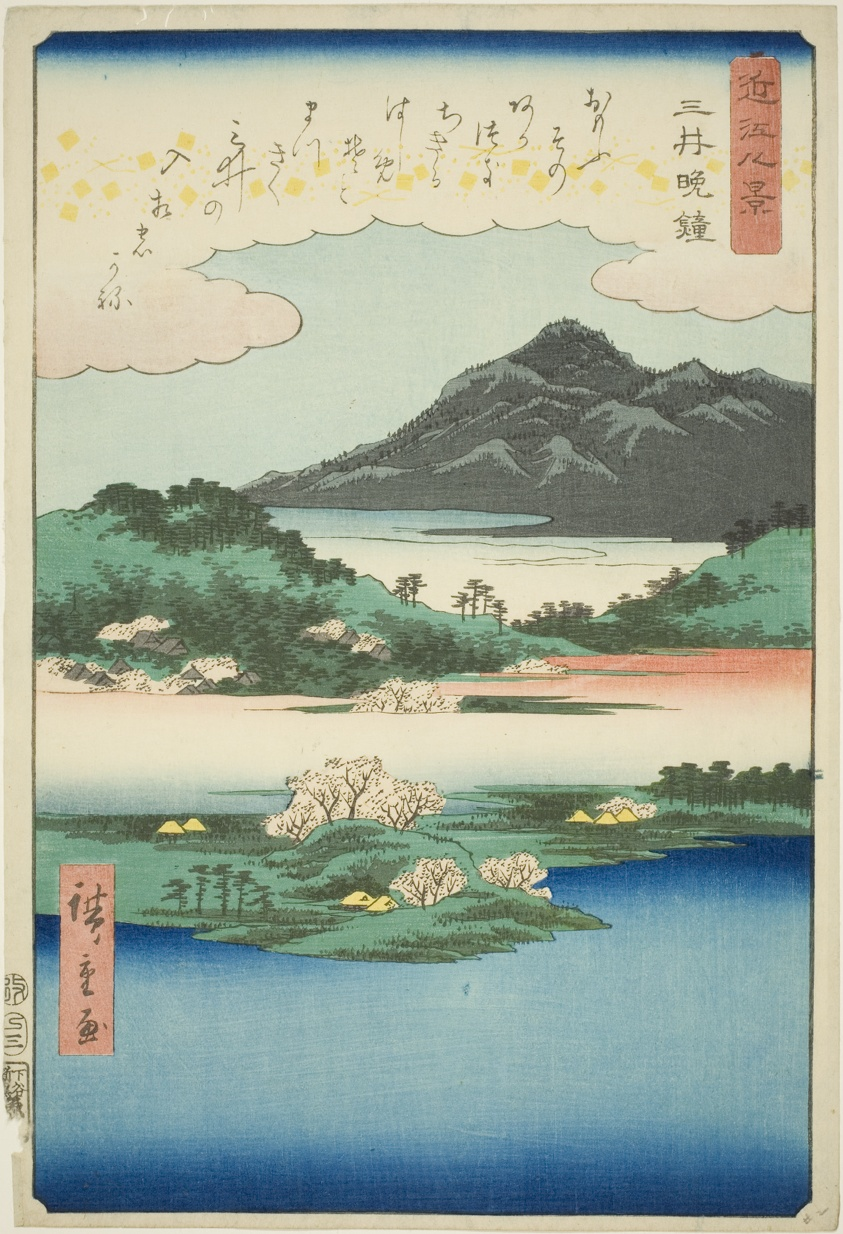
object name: Print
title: Evening Bell at Mii Temple (Mii bansho), from the series "Eight Views of Omi (Omi hakkei)"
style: Japanese (culture or style)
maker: Utagawa Hiroshige 歌川 広重; Japanese, 1797-1858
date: 1857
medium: Color woodblock print; oban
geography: Japan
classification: woodblock print; print; asian art